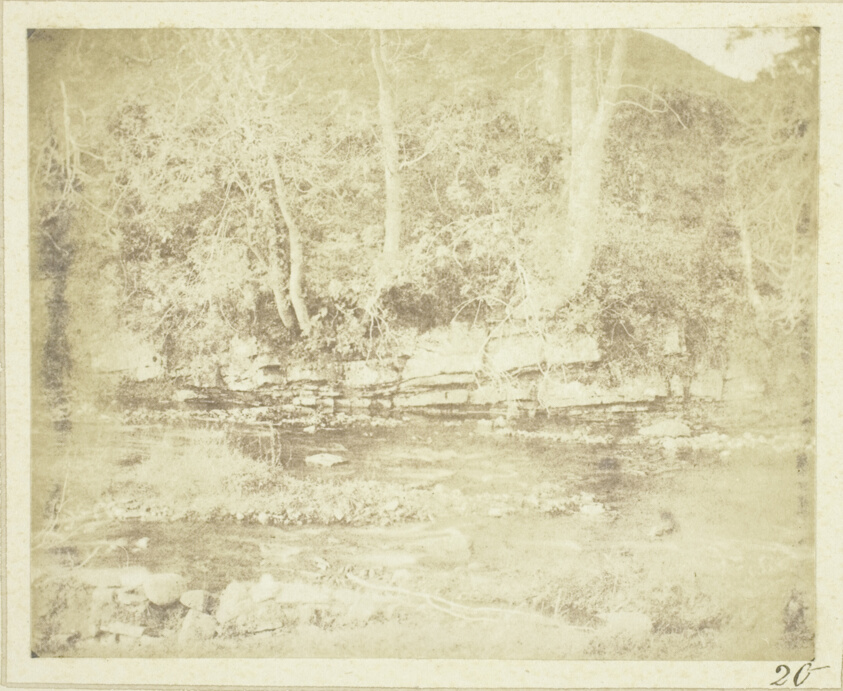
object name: Photograph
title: A Mountain Rivulet which Flows at the Foot of Doune Castle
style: 19th century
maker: William Henry Fox Talbot (English, 1800–1877)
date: 1844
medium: Salted paper print, plate XX from the album "Sun Pictures in Scotland" (1845)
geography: England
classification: salted paper print; photographic process; photography; photograph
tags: Collected by Hugh Edwards